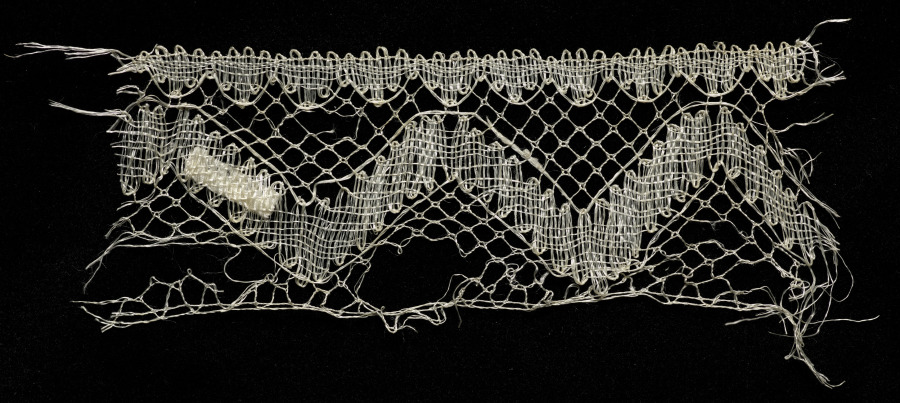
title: Lace Edging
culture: Spain, Huelva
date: 1700s–1800s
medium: Bobbin lace (blonde lace)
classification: Lace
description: The style and technique of this lace is the same as that used to make lace of gold metal thread.